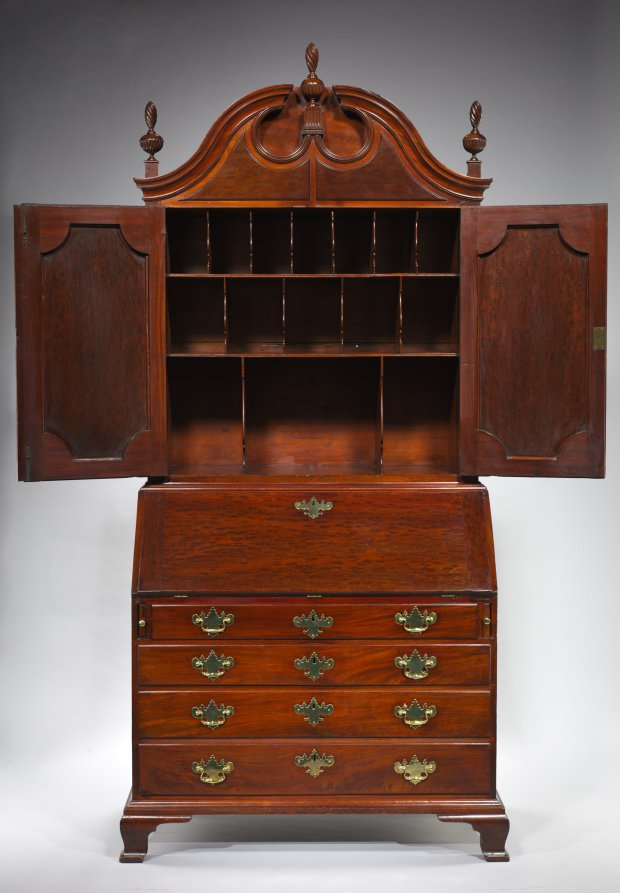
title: Desk and Bookcase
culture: America, Rhode Island, Newport, 18th century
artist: attributed to John Townsend (American, 1732–1809)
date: c. 1780–95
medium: "Plum pudding" mahogany, red cedar, chestnut, white pine, brass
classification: Furniture and woodwork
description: In the 1700s, Newport, Rhode Island, was the fifth largest city in North America and one of the most important centers of shipping and trade along the Eastern Seaboard. Orders for furniture from its celebrated cabinetmakers came in from far and wide. This desk and bookcase was likely made for Oliver Wolcott Sr., a signer of the Declaration of Independence and later governor of the State of Connecticut. Eventually, the desk passed down through his family to Dorothy Draper, an important 20th-century interior decorator, and ultimately to her daughter, Penelope Draper Buchanan, whose husband gave it to the museum after her death—a rare, unbroken line of succession. Large desks were designed to hold all the necessary components of a gentleman’s office under lock and key: books, papers, pens and ink, and important documents. To serve such a function desks also became complicated masterworks of the cabinetmaker’s art, incorporating many parts from small drawers to large panels cut from a single tree, making them among the most expensive types of furniture available. This desk and bookcase exhibits the characteristic traits of classic Newport furniture—“plum pudding” mahogany, cupcake-like finials, and a carved shell on the inside of the desk.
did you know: This desk and bookcase was likely made for Oliver Wolcott Sr., a signer of the Declaration of Independence and later governor of Connecticut.